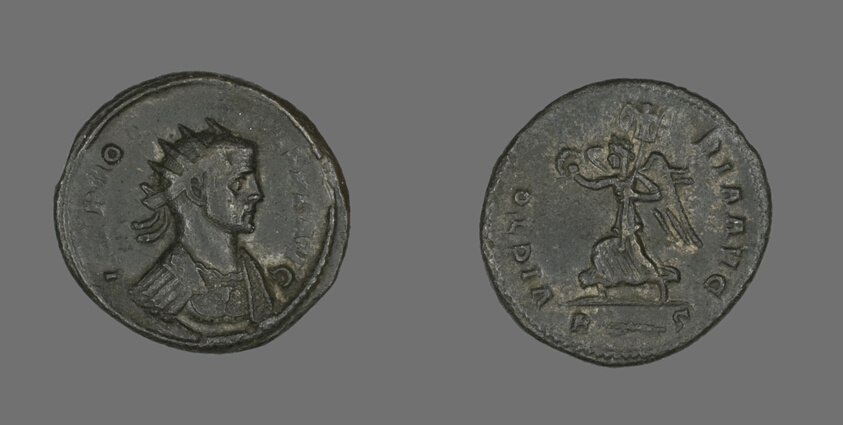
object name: Coin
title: Coin Portraying Emperor Honorius?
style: roman (ancient, style or period), ancient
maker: Roman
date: 384-423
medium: Silver and bronze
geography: Roman Empire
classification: coin; ancient art